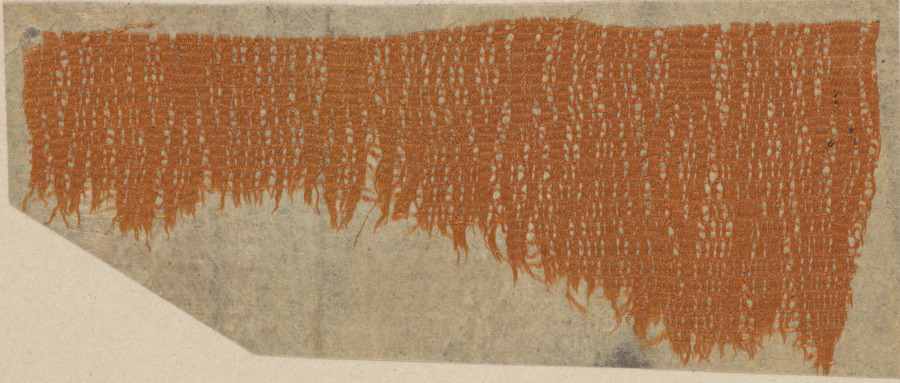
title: Fragment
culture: China, Tang dynasty (618–907) or Japan, Nara period (710–794)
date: 700s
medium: gauze; silk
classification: Textile